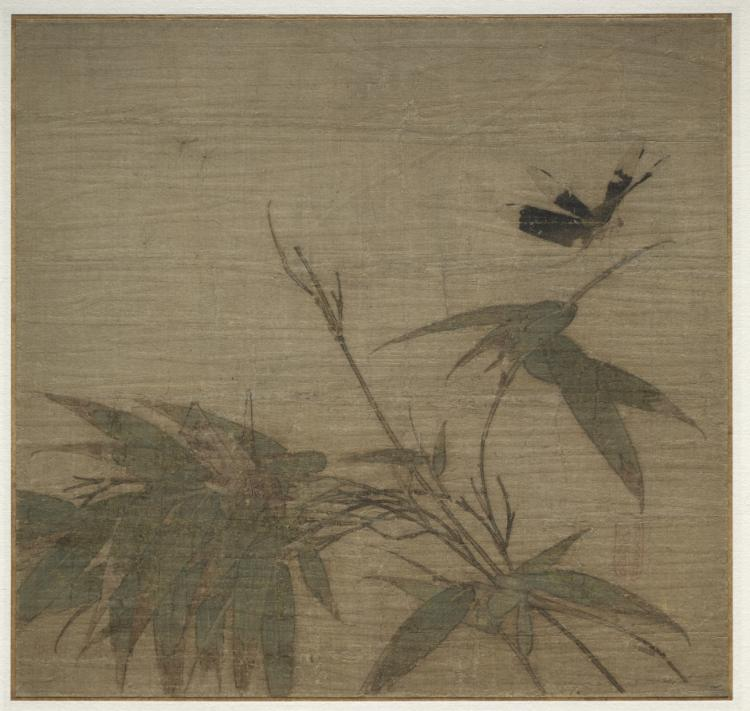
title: Insects and Bamboo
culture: China, Southern Song dynasty (1127–1279)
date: 1200s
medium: Album leaf; ink and light color on silk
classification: Painting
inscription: 1 unidentified seal.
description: This painting represents a microcosm (a world in small) of the Jiangnan ecosystem: while the bush cricket feeds on bamboo, the male widow-skimmer dragonfly is a predator of small insects like mosquitos. Mosquitoes, abundant in late summer and early autumn, suggest the fall season.